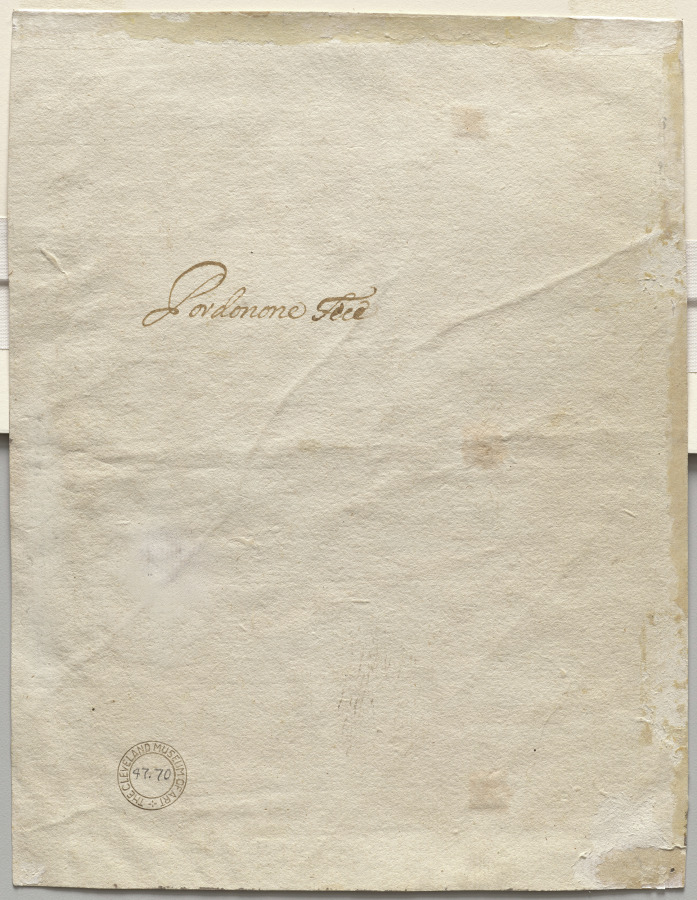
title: The Funeral of Saint Stephen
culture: Italy, Florence, 15th century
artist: Fra Filippo Lippi (Italian, c. 1406–1469)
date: c. 1460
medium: pen and brown ink with brush and brown wash with traces of stylus over traces of black chalk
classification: Drawing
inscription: verso of secondary support, center, in brown ink: Pordonone Fece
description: Few drawings exist from the mid-1400s in Italy, and most that have are figure and drapery studies from artist's model books. So this sheet is extremely important as one of the few known compositional studies by a major artist from this period. Stylistic comparison to other drawings by Lippi and the fact that it relates to a fresco painting by him of the same subject confirms its authenticity.